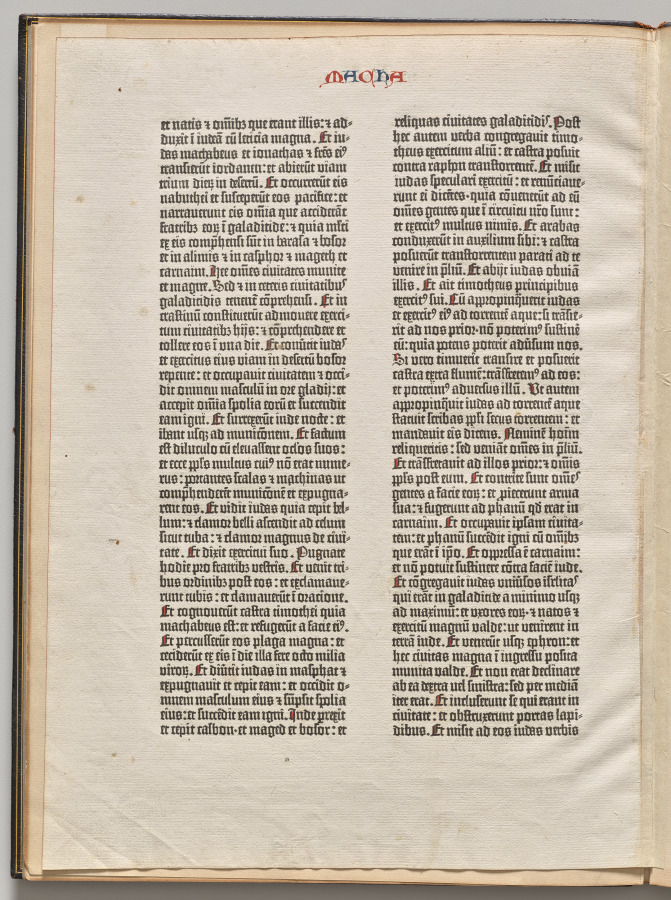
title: Page from a Gutenberg Bible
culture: Germany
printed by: Johann Gutenberg (German, c. 1397–1468)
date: c. 1450–1455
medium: printed page with hand-applied initials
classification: Bound Volume